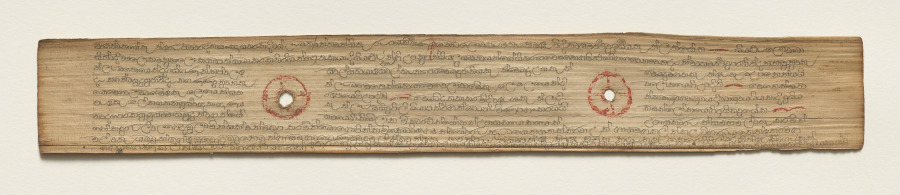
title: Leaf from a Buddhist Manuscript (verso)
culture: Sri Lanka, Singhalese, Late 17th century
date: c. 1700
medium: fiber paper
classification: Manuscript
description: Palm leaf material is still used for manuscripts in Sri Lanka. The palm leaves are prepared first by boiling them, drying them in the sun, and then rubbing them with oils. Scribes then use a metal stylus to incise the text. Then charcoal powder is wiped across the pages, filling in only the inscribed lines.